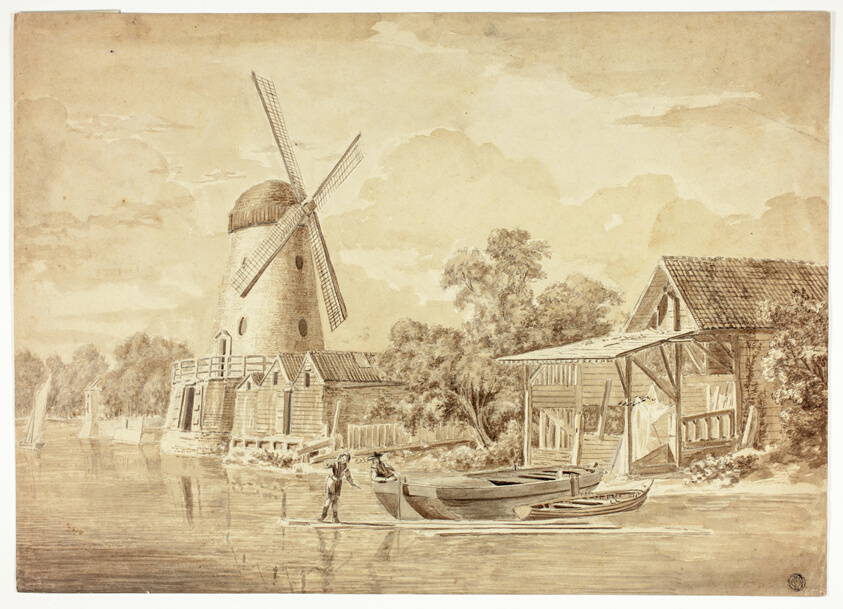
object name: Drawing and Watercolor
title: Two Figures with Docked Boats near Windmill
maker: Hendrick Frans de Cort (Flemish, 1742-1810)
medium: Pen and brown ink, with brush and brown wash, over graphite, on cream wove paper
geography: Flanders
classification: ink or chalk wash; drawings (visual works); prints and drawing